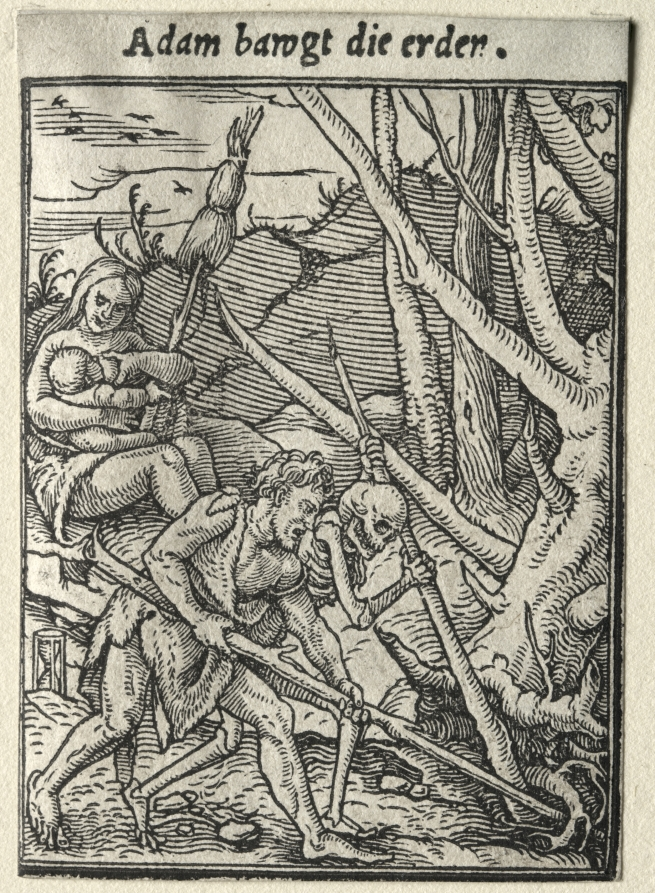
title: Dance of Death: Adam Tilling the Ground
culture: Germany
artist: Hans Holbein the Younger (German, active England and Switzerland, 1497/98–1543)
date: c. 1526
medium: woodcut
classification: Print